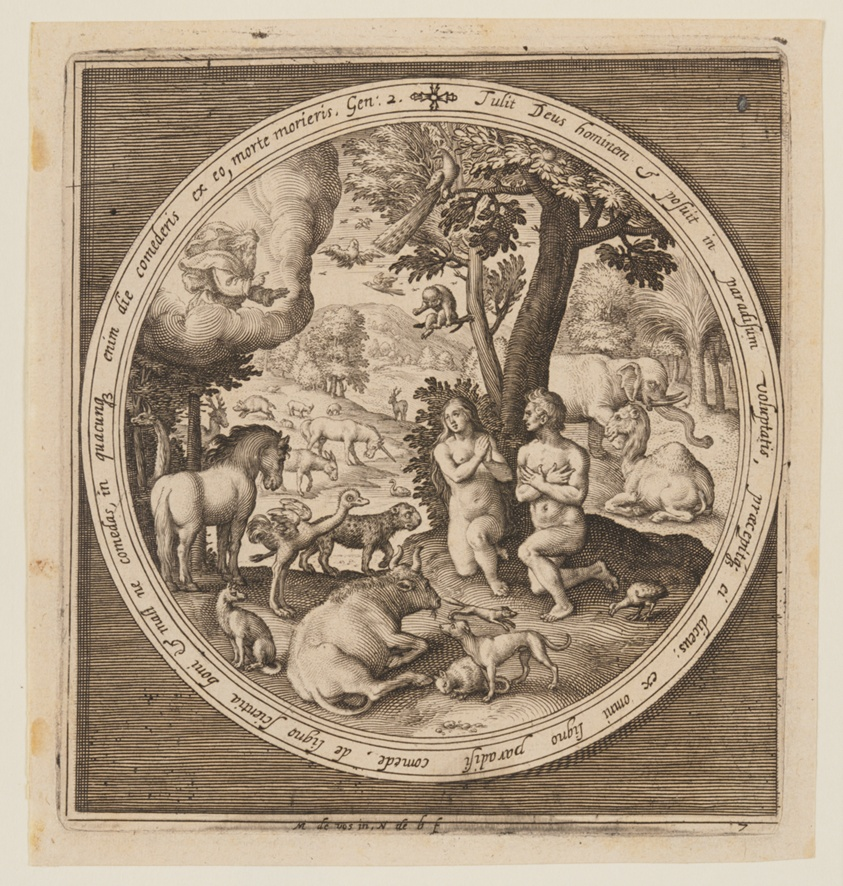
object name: Print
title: Adam and Eve in Paradise, from The Creation to the Expulsion from Paradise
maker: Nicolaes de Bruyn (Flemish, 1571–1656); after Maarten de Vos (Flemish, 1532–1603)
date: c. 1610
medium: Engraving on ivory laid paper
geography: Flanders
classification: engraving; paper; print; prints and drawing